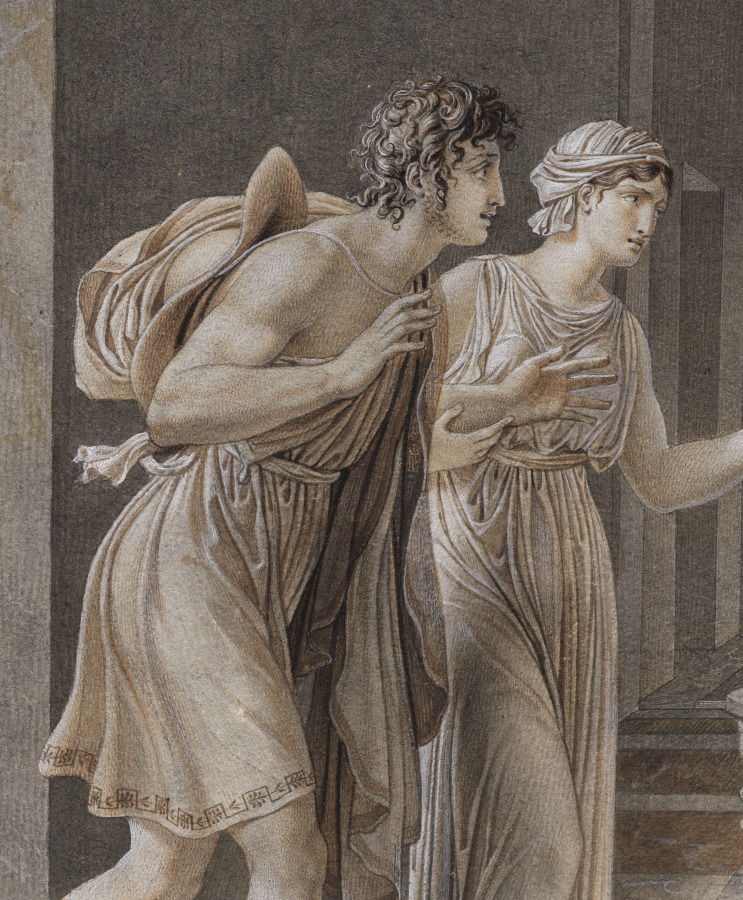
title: The Meeting of Orestes and Hermione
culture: France, early 19th Century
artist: Anne-Louis Girodet de Roucy-Trioson (French, 1767–1824)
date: c. 1800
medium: pen and brown and black ink, point of brush and brown and gray wash, with black chalk and graphite, heightened with white gouache, on cream wove paper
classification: Drawing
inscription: signed, lower left, in brown ink: ALG [artist’s monogram] / INV.; lower left, in black chalk: A L GIRODET INV.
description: When the French painter Jacques-Louis David was approached to work on a new edition of Jean Racine’s plays, he passed the task to his pupil Girodet, who excelled at illustrating literature. This highly refined drawing depicts a scene from Racine’s Andromaque, a complicated story of unrequited love and political treachery. Cléone introduces the love-blind Orestes to Hermione, who exploits his affection to make him do her bidding. Girodet skillfully contrasts Orestes’s eagerness and Hermione’s calculating character. With folded arms, she turns away, as if a statue between the columns of a cool marble interior. Yet Hermione’s sly, backward glance alerts the viewer of her cunning manipulation, which eventually drives Orestes mad.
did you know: The leg of the table behind Hermione has the form of a siren, a dangerous mythological creature that destroys anyone who hears its song.